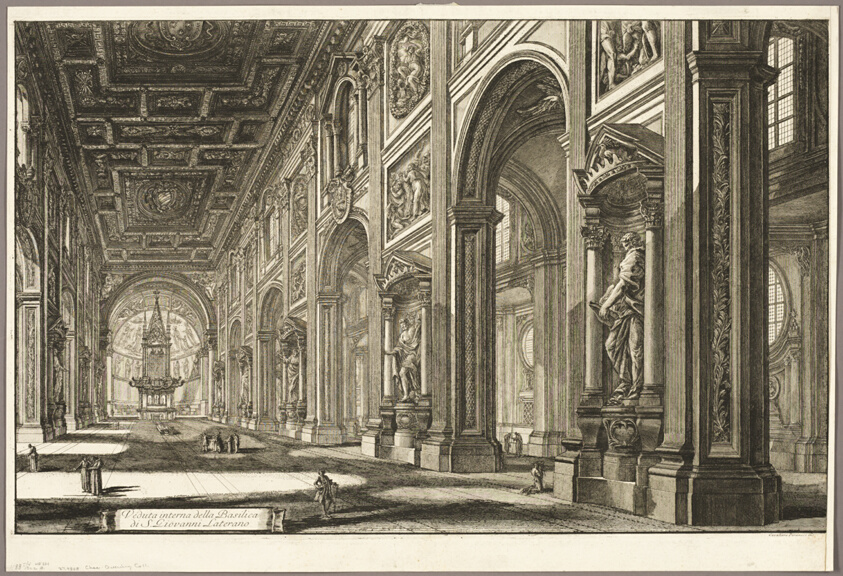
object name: Print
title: Interior view of the Basilica of St. John Lateran, from Views of Rome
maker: Giovanni Battista Piranesi (Italian, 1720-1778)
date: 1768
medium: Etching on ivory laid paper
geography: Italy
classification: etching; print; prints and drawing